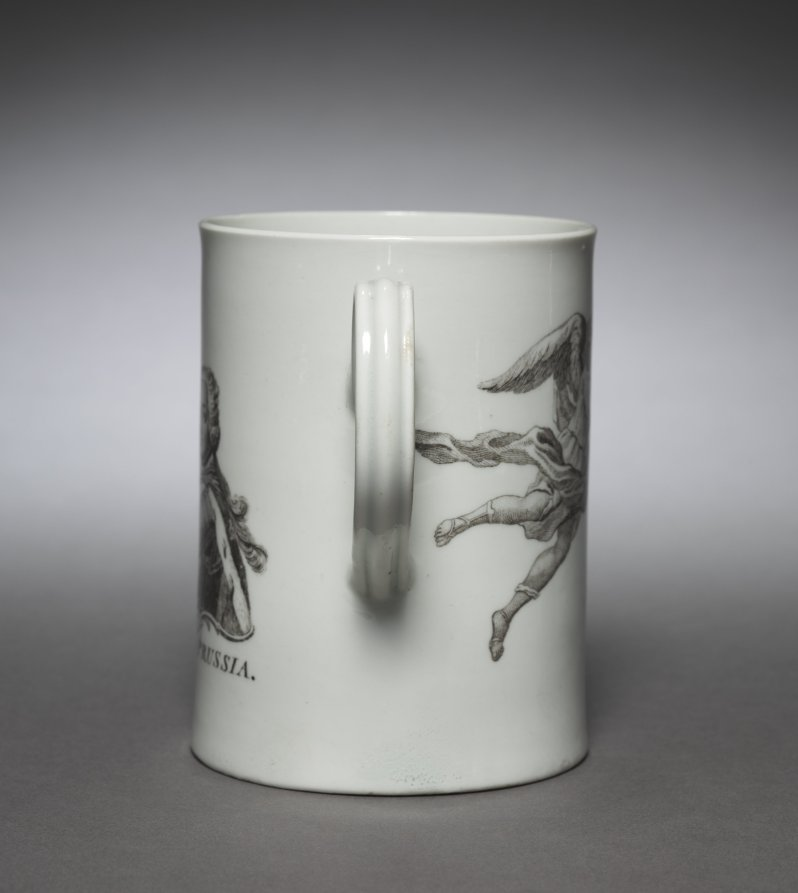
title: Cann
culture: England, 18th century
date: c. 1775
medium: ceramic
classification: Ceramic